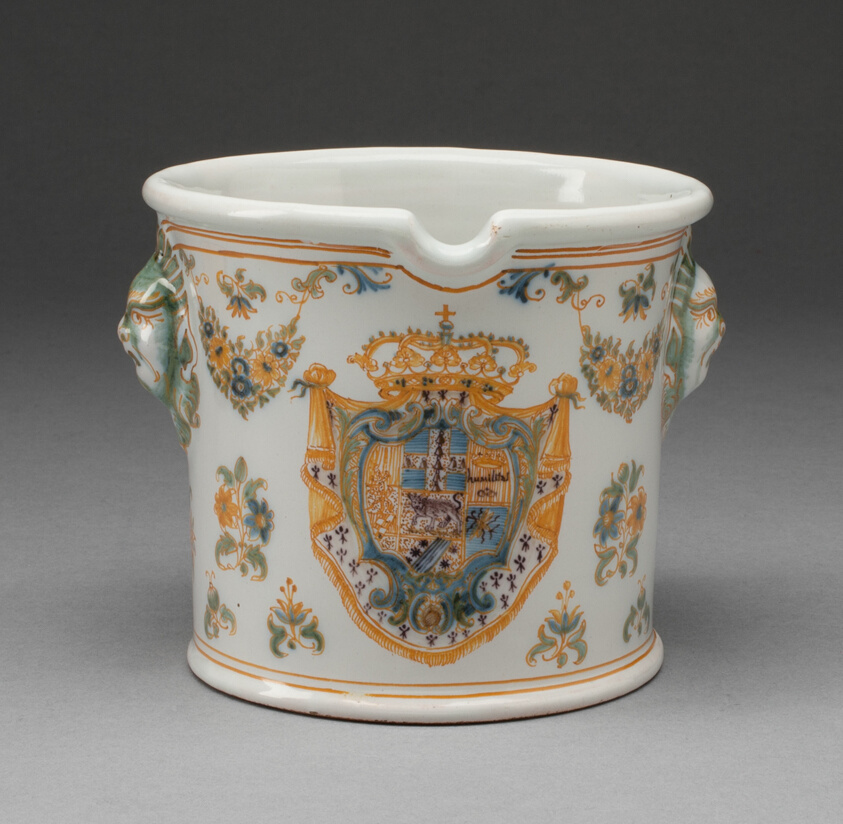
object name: Ceramics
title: Glass Cooler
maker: Olérys-Laugier Manufactory; France, founded in 17th century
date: c. 1740/50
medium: Tin-glazed earthenware (faience)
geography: Moustiers-Sainte Marie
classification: tin-glazed ware; earthenware; european decorative arts; ceramics